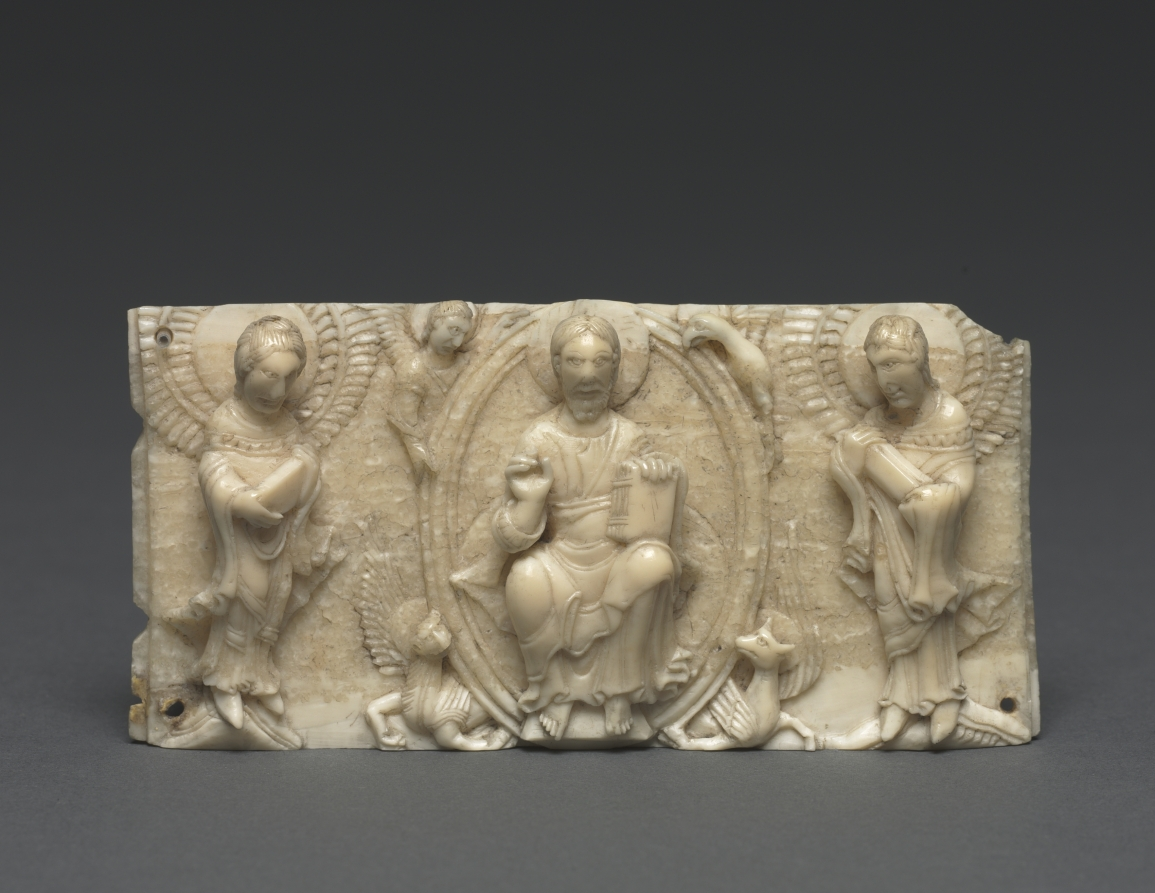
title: Plaque from a Portable Altar Showing Christ and the Apostles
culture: Germany, Lower Rhine Valley, Romanesque period, 11th century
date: 1050–1100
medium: walrus ivory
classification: Ivory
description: This intricately carved ivory panel once decorated the side of a portable altar. One of three plaques, it depicts Christ in Majesty and his apostles and were the first major acquisition of William M. Milliken, the museum's first curator of decorative arts and later director (1930–1958). As Milliken later recalled, the pieces "were immensely intriguing, monumental in scale, even if tiny in size, the Christ in the mandorla could have been enlarged and would have graced the tympanum of a great cathedral."